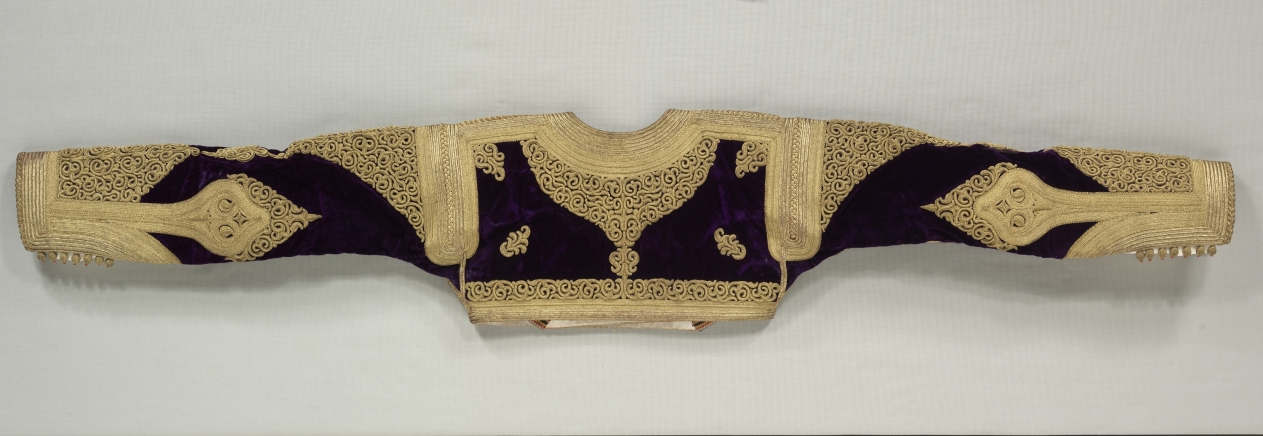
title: Women's Jacket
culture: Turkey ?, late 19th century (?)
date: late 19th century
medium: velvet decorated with gold twisted cords; modern cotton lining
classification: Garment